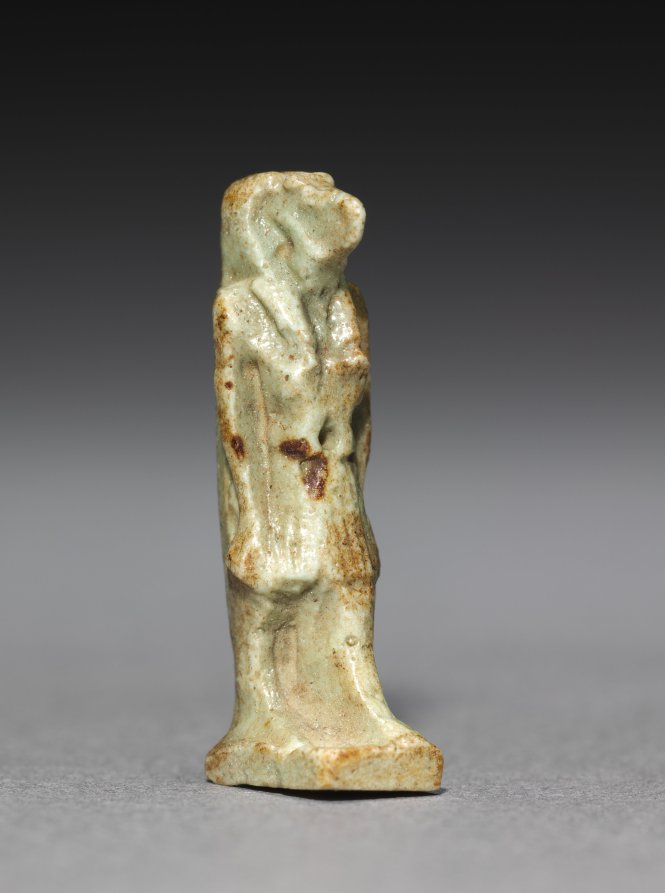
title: Amulet of Thoth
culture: Egypt, Late period (715–332 BCE), Dynasty 30–Greco-Roman period (332 BCE–395 CE), Ptolemaic dynasty (305–30 BCE)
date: 380–30 BCE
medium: gray green faience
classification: Amulets